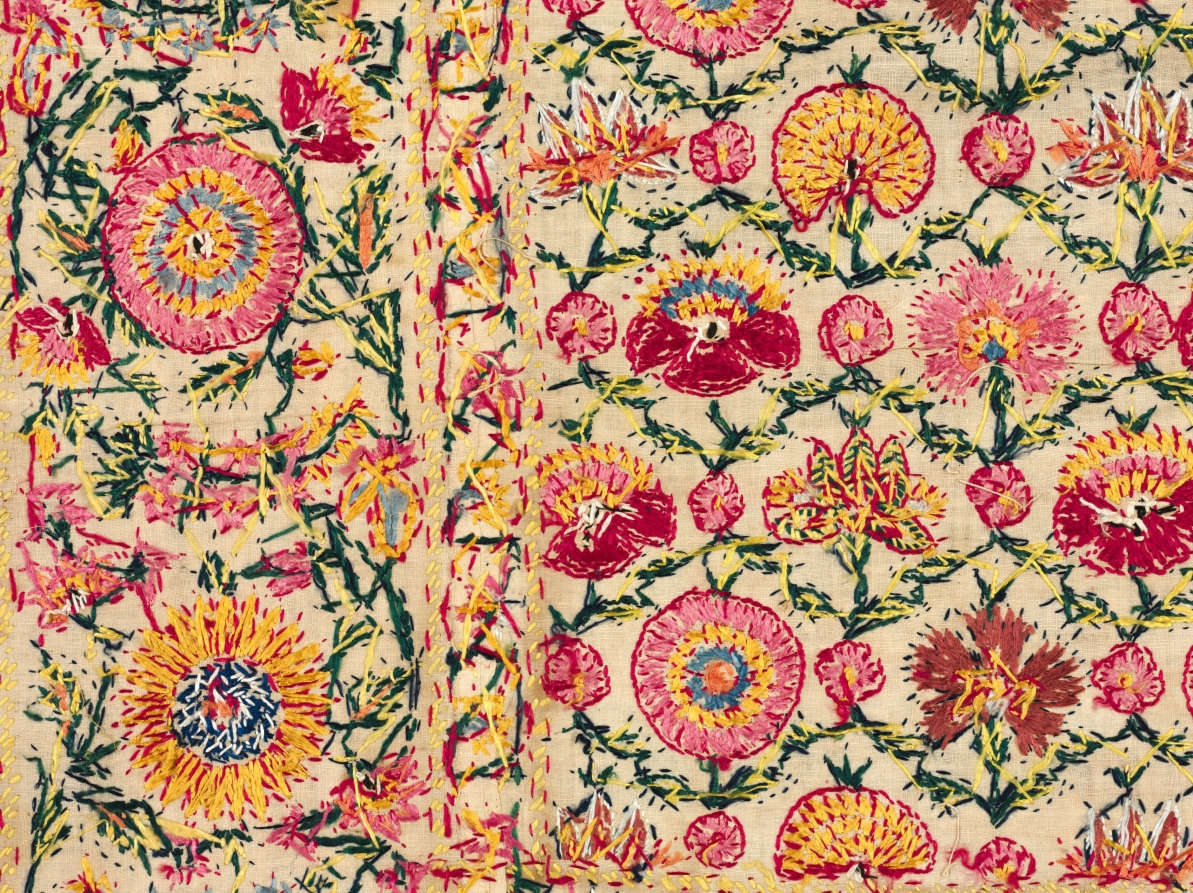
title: Embroidered Cover or Hanging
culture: India, Delhi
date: 1600s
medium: Silk on linen tabby ground; embroidery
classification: Embroidery